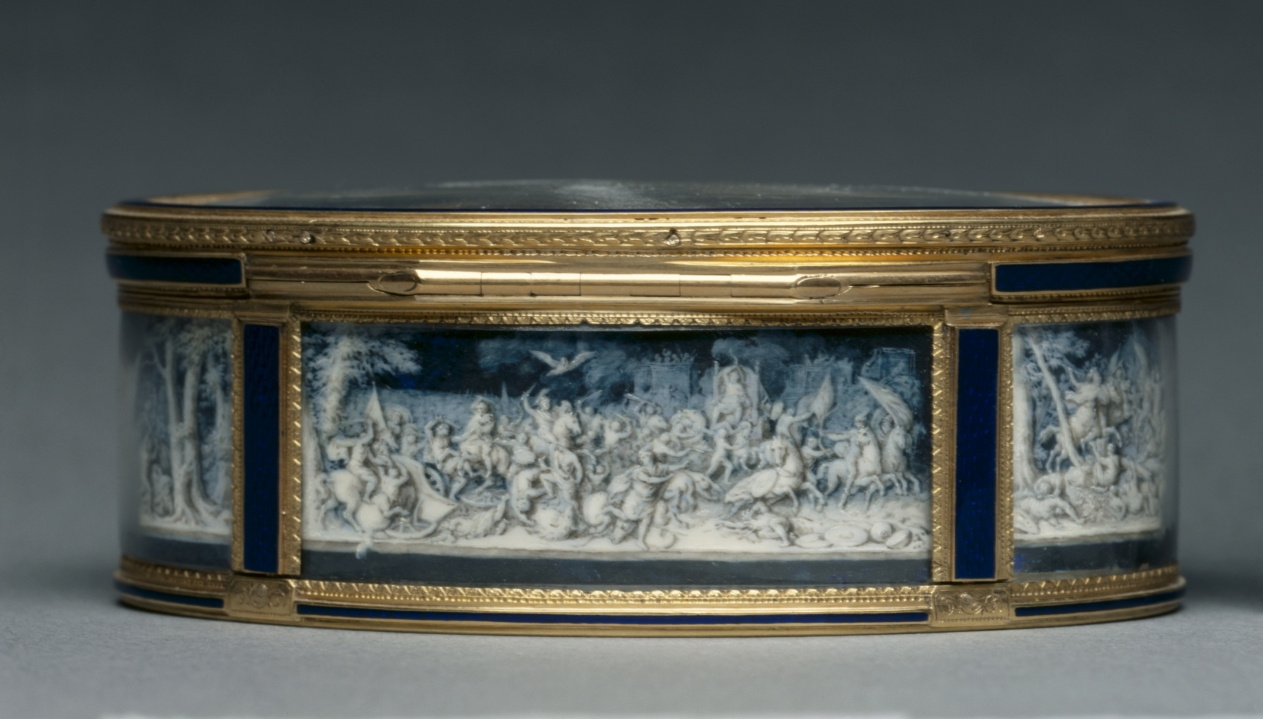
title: Snuff Box (Tabatière)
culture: France, 18th century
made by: Pierre Marie Gault De Saint-Germain (French, 1754–1842)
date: 1779–80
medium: gold and enamel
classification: Miscellaneous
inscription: [Warden's mark for Paris, 1779-1780, inside bottom; inside cover]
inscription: [Illegible maker's mark, inside bottom; inside cover]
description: Decorated with images derived from ancient Greek and Roman history in the style of cameos, intricately carved gemstones, this box evokes the rising neoclassical imagery in France. The scenes on the box recount several key events in the life of Alexander the Great. The enameled works were inspired by a series of prints by Sébastien Leclerc which drew from a series of paintings by Charles Le Brun.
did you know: The original series painted by Charles Le Brun, The Battles of Alexander (Les Batailles d’Alexandre) (1600s), was commissioned by King Louis XIV of France.